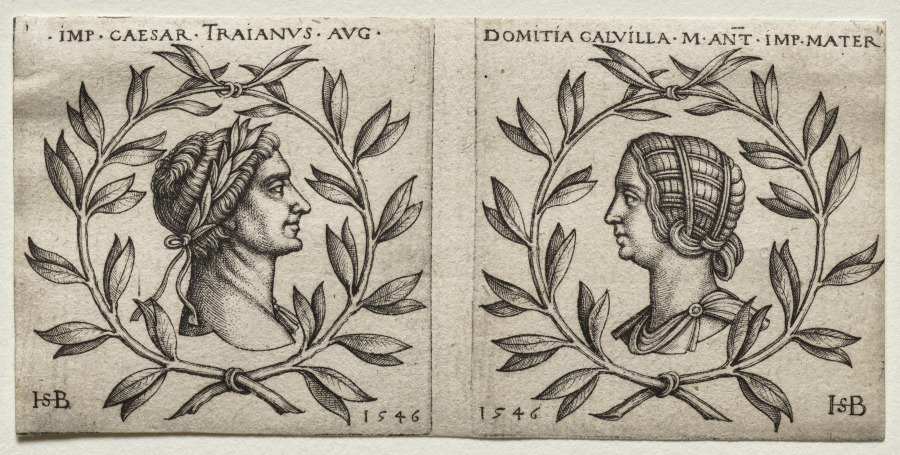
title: Busts of Emperor Trajan and Domitia Calvilla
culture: Germany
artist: Hans Sebald Beham (German, 1500–1550)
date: 1546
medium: engraving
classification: Print